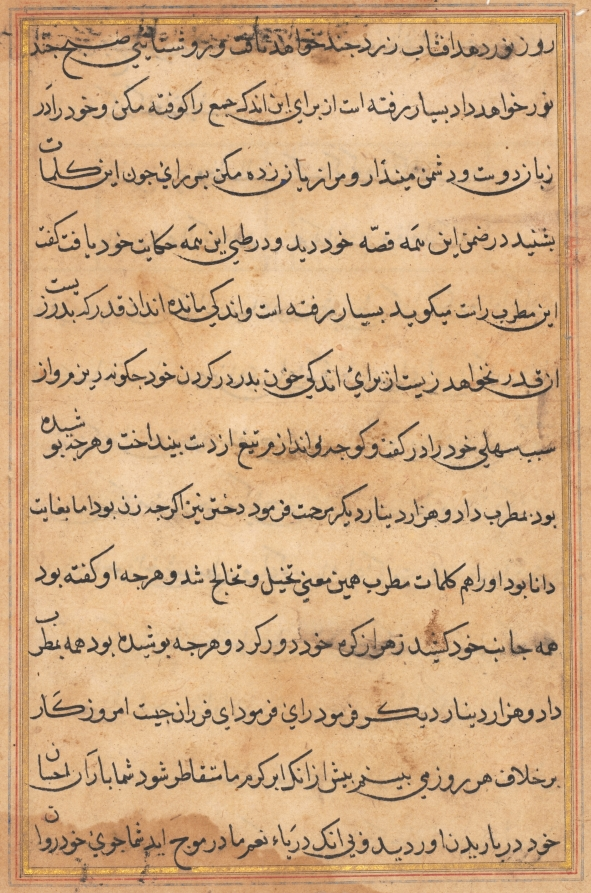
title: Page from Tales of a Parrot (Tuti-nama): text page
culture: Mughal India, court of Akbar (reigned 1556–1605)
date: c. 1560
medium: gum tempera, ink, and gold on paper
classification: Painting